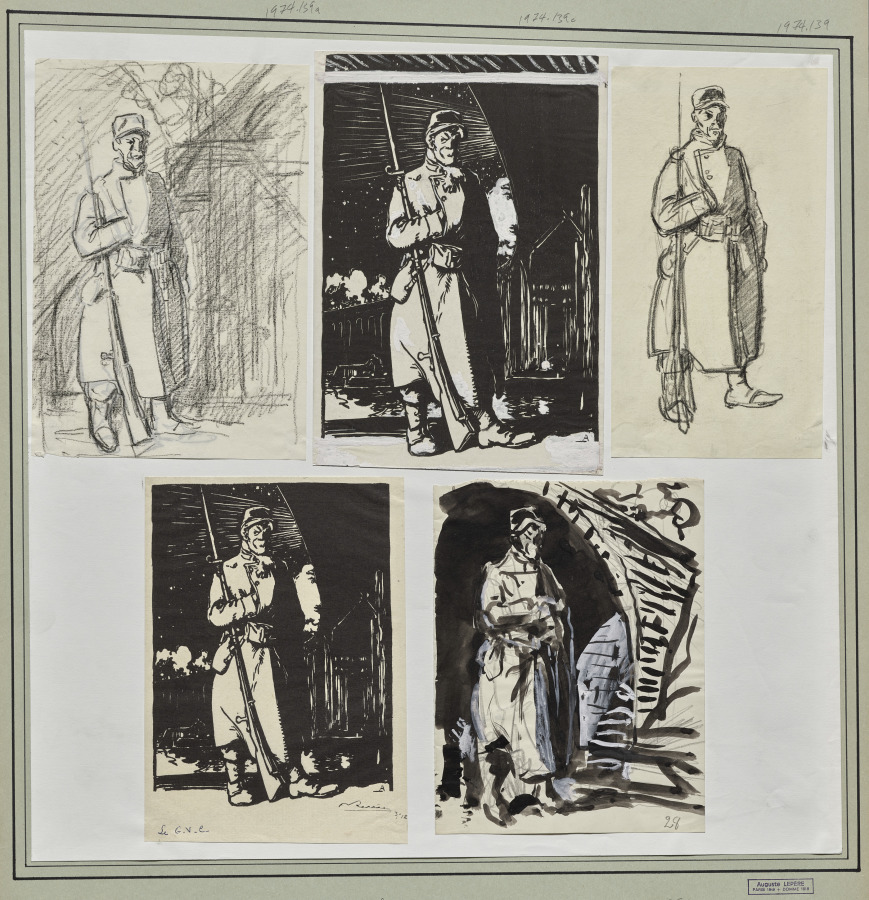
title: Le G.V.C.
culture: France, 20th century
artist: Auguste Louis Lepère (French, 1849–1918)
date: 1914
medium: black crayon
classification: Drawing